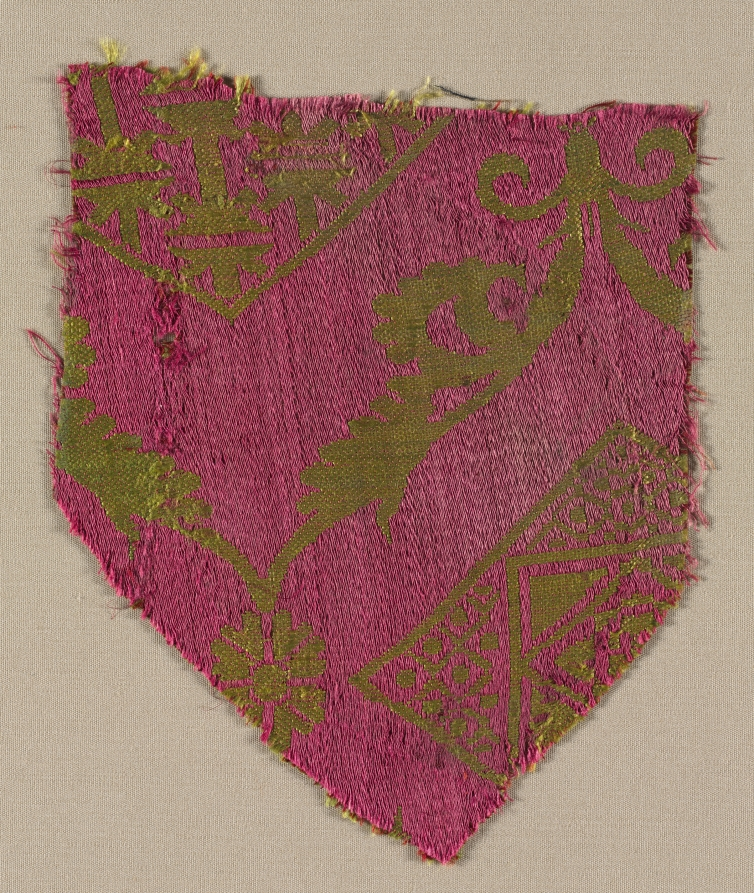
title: Silk Fragment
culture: Egypt or Syria, Mamluk period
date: 1300s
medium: lampas weave, silk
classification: Textile